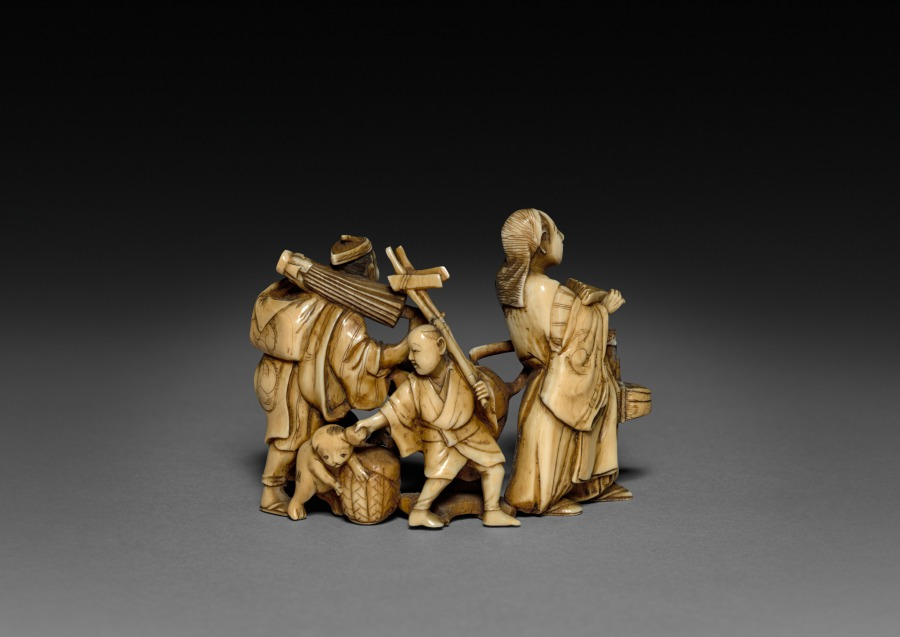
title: Procession with Four Figures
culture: Japan, Meiji period (1868–1912)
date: Late 1800s- Early 1900s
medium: ivory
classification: Ivory